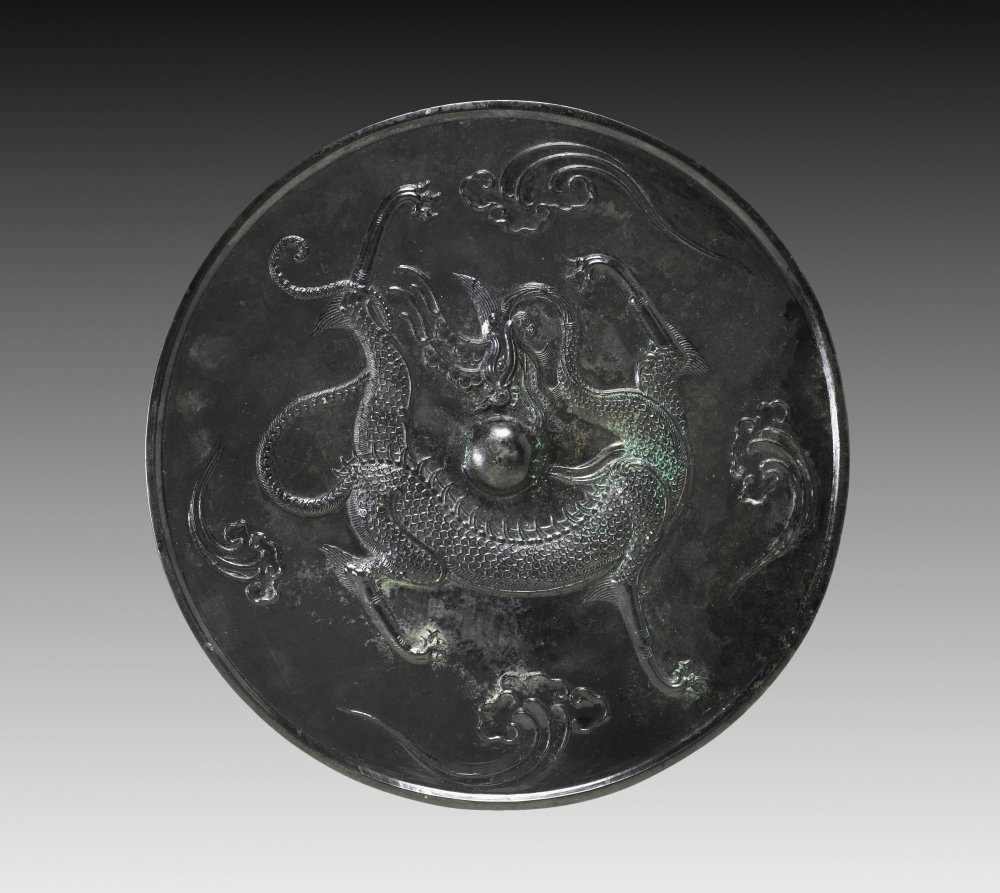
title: Mirror with a Coiling Dragon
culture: China, Tang dynasty (618-907)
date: 700s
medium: bronze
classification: Metalwork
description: Cast in high-tin and low-lead bronze by the lost wax method, this mirror has a dark and lustrous patina known as heiqigu (literally, “black lacquer antique”). It bears a design of a coiling dragon among trailing clouds. With a small, elongated head connecting to an S-curve of the neck that is as sinuous as the body and tail, the dragon of the Tang period is unique.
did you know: The patina of this mirror is known as heiqigu (literally, “black lacquer antique”).